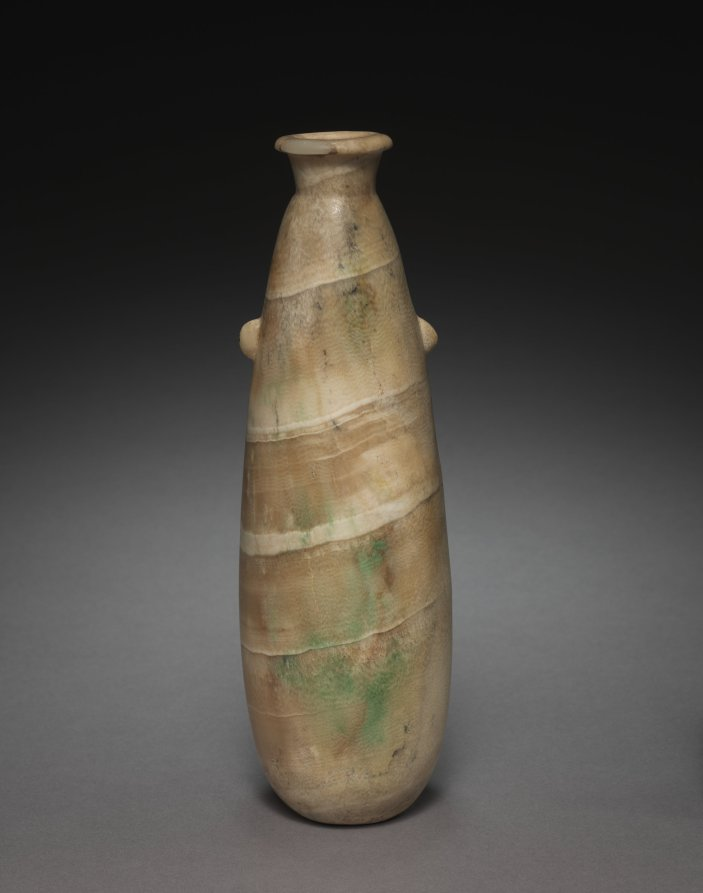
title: Alabastron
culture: Egypt, Late period (715–332 BCE), Dynasty 26 or later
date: 664–525 BCE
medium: travertine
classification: Vessels